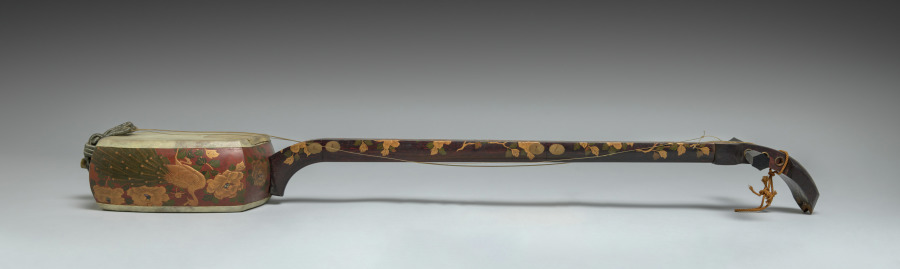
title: Guitar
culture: Japan, Edo period (1615–1868)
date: early to mid-1800s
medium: mixed media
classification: Musical Instrument